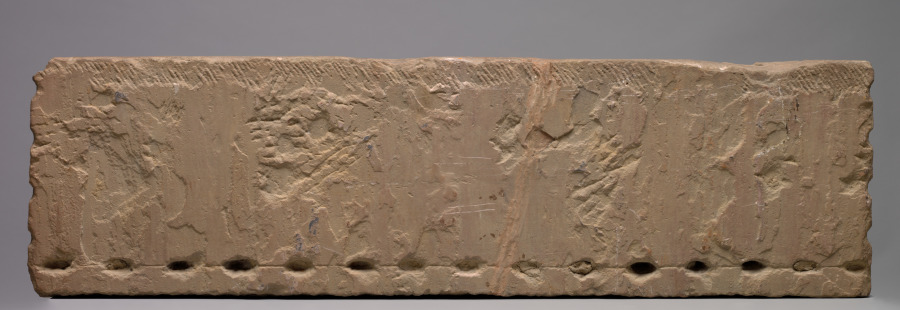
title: Nine Celestial Bodies (Navagraha)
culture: Central India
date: 700s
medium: Sandstone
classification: Sculpture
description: Near temple entrances, the nine celestial bodies were depicted in an orderly row, often in figural form. From left to right they are: Sun with a tall crown and the female Dawn in front of him. The next five figures are nearly identical: Moon, Mercury, Venus, Mars, and Jupiter. As a portent of doom, Saturn was wounded by a goddess to prevent him from moving swiftly, so he stands on one leg. The bodiless head is Rahu, the eclipse, who swallows the moon until it falls out his neck. The serpent-tailed figure is a comet.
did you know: The Sun (Surya) is the only figure who wears boots and holds fully open lotus flowers.